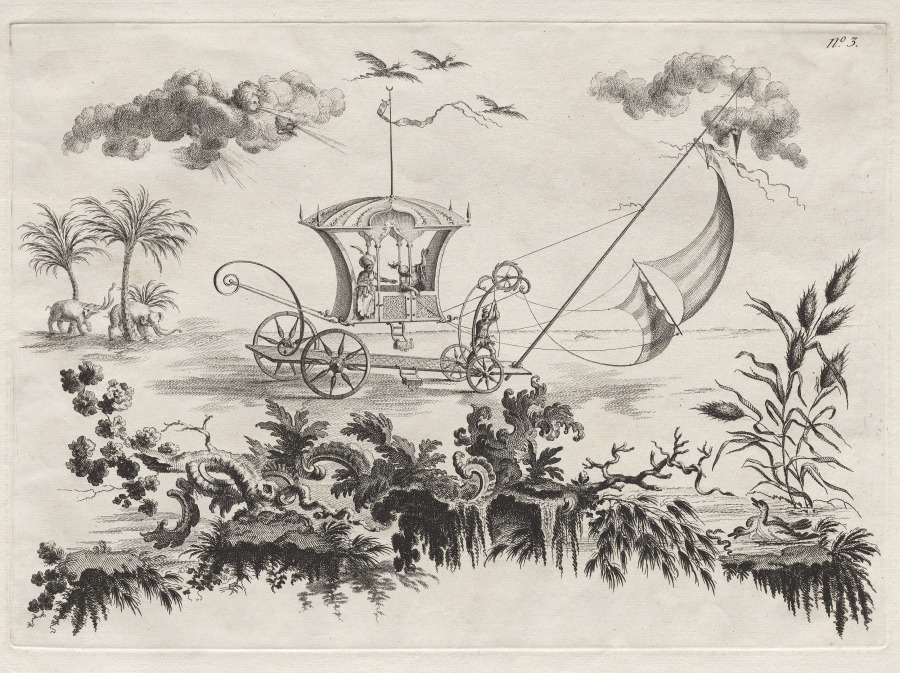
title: The Carriages used on the Moon and which move by sails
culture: Italy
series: Suite of the Most Notable Things Seen by John Wilkins Erudite English Bishop during His Famous Voyage from the Earth to the Moon … dedicated to Sir William Hamilton ambassador to the Court of Naples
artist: Filippo Morghen (Italian, 1730–after 1807)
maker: possibly after Jean-Pierre-Louis-Laurent Hoüel (French, 1735–1813)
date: c. 1769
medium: etching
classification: Print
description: Filippo Morghen’s set of 10 etchings is outstanding among visual narratives of imaginary voyages to the moon, both visual and literary, that intrigued 18th-century European audiences. A title page and nine plates depict the imagined lives and economy of moon dwellers. These include modes of transport such as large birds and sailboats propelled by giant bellows, enormous scissors for capturing wild beasts (including an oversized rat), and the use of giant pumpkins as fishing boats and as dwellings. Representations of the moon dwellers are based on inaccurate and imaginary European interpretations of Asian, Ottoman, and Native American cultures—called chinoiserie and turquerie—that permeated the decorative and visual arts of the period.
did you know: Morghen based this print series on three books dedicated to moon exploration, including Bishop Francis Godwin’s Man in the Moone, 1640.